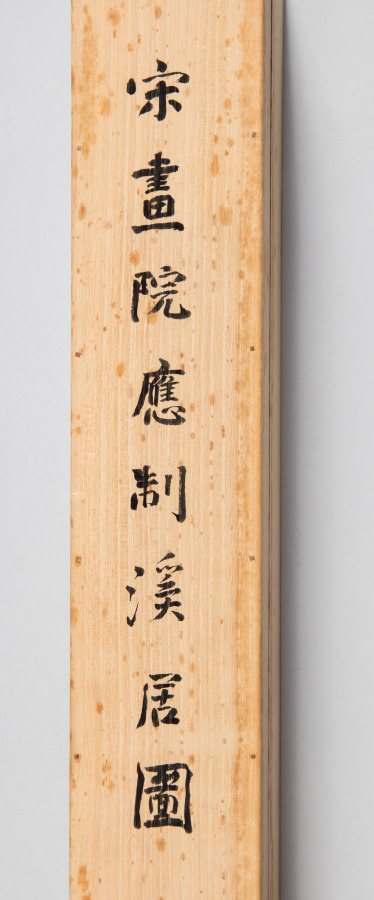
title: Mountain Market, Clear with Rising Mist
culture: Korea, Joseon dynasty (1392–1910)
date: early 1500s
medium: Hanging scroll; ink on silk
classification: Painting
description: This painting depicts several vignettes of the scholar-hermit’s various activities. In the lower left corner, the scholar-hermit is portrayed welcoming his guest in the courtyard. In the middle section on the lower bottom, the scholar and his guest are shown encountering another traveler on the bridge and exchanging their greetings. After crossing the bridge, the scholar visits a friend who lives in a compound of multiple buildings. The two friends decide to take a short walk. Both appear in a terraced cliff, enjoying a mountain vista and the fragrance of an old pine tree carried by the gentle wind. The scholar continues his journey with his two servants. They are portrayed crossing a winding wooden bridge. Right beyond the colossal rocky mountain, a panoramic view to a bustling market place unfolds, suggesting that it may be the place where the scholar-hermit’s entourage would visit. Perhaps the scholar need to buy items such as books, rolls of papers, and brushes, all essential to scholarly life. Toward the upper left corner, another group of travelers is landing on the river bank that leads to the city gate; they may be headed to the multistoried Buddhist stupa nestled on the top of the mountains.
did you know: Due to its stylistic features, this painting has long been believed to be a Chinese painting of the Northern Song period, dated to the 12th century.